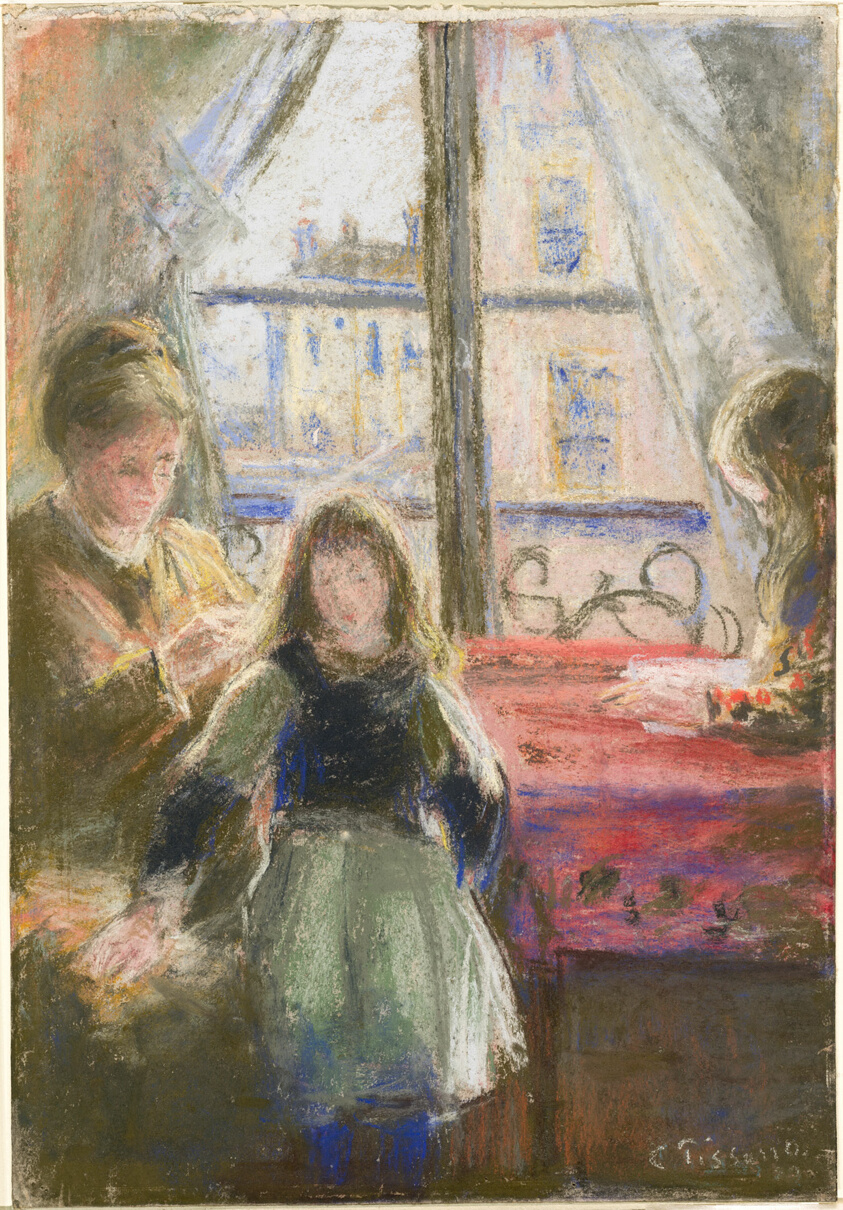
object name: Drawing and Watercolor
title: At the Window, rue des Trois Frères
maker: Camille Pissarro (French, 1830–1903)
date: 1878–79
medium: Pastel on cream wove pastel paper, perimeter mounted on light gray wove paper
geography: France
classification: prints and drawing; pastel; drawings (visual works)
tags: interior